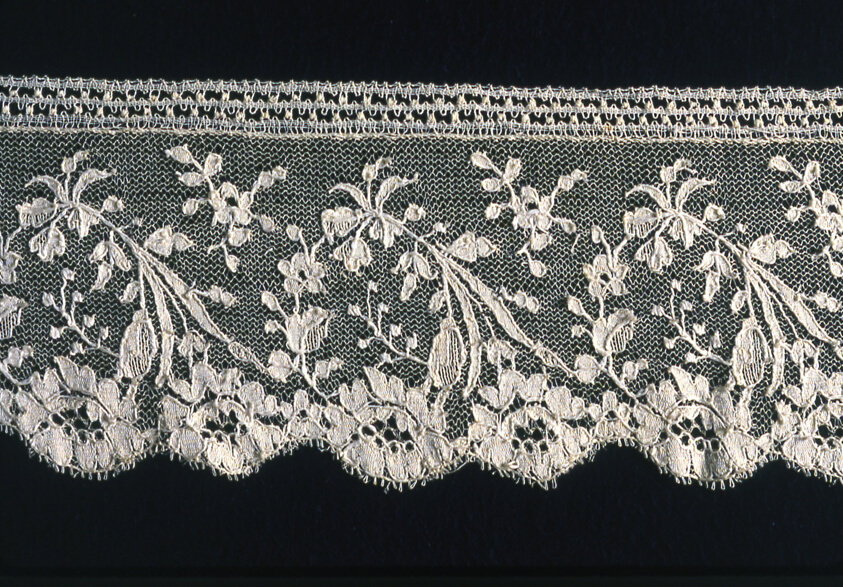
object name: Costume and Accessories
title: Shaped Border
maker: England or France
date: 1860s/80s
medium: Cotton, linen, and silk, machine-made lace of a type known as "Leavers"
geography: England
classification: costume accessory; lace - machine; textile; costume; costume accessory - headdress; costume accessory worn above the waist